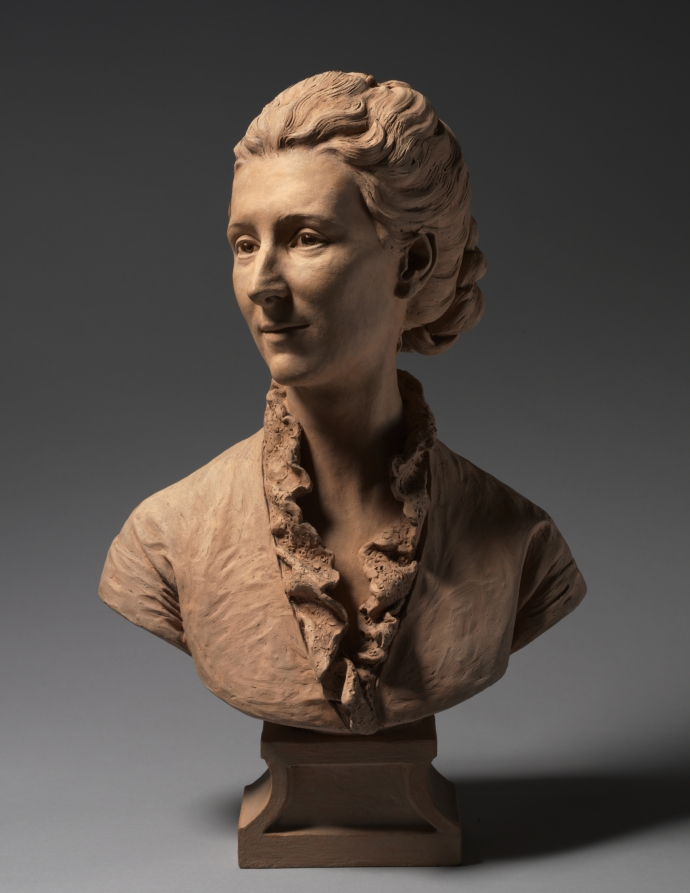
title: Bust of a Lady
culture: France, 19th century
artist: Jules Dalou (French, 1838–1902)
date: c. 1875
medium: terracotta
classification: Sculpture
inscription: Signed beneath right shoulder: "DALOU/1875"